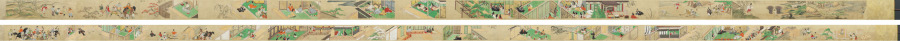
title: The Saltmaker's Story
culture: Japan, Edo period (1615–1868)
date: early 1600s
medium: Pair of handscrolls; ink, color, and gold on paper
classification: Painting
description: Once read and copied by girls at New Year’s celebrations and included in dowries, The Saltmaker’s Story is a rags-to-riches tale in which daughters are gifts from the gods. Despite his simple outlook, the main character progresses from humble roots as an associate at Kashima Shrine to the elite status of grandfather of the emperor through the intervention of the Kashima deity. The Saltmaker’s Story is traditionally presented in a set of three scrolls, but the text of this set has been removed by a previous owner, who remounted the illustrations as a pair.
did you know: These handscrolls originally alternated text and painting, but the texts were removed.